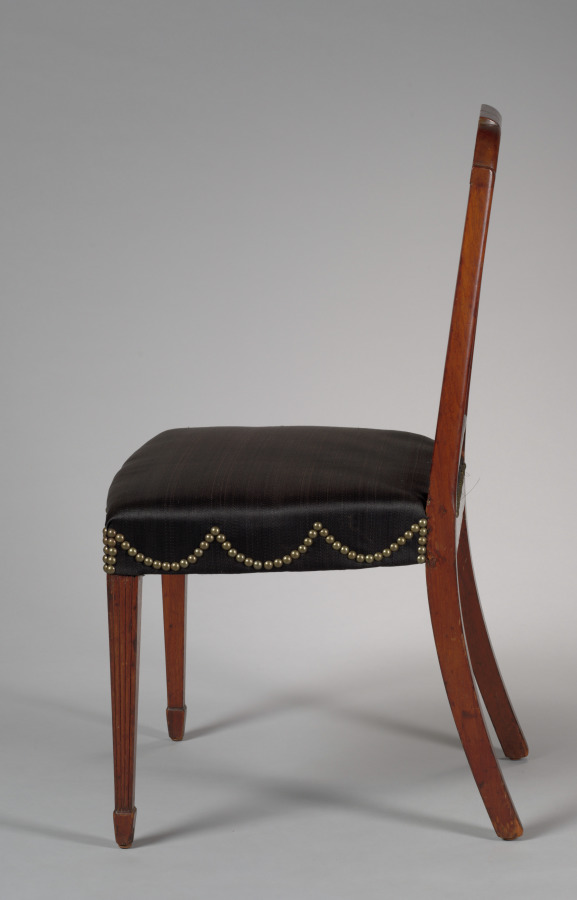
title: Side Chair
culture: America, Massachusetts, Boston, late 18th Century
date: c. 1790–1800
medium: mahogany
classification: Furniture and woodwork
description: Chairs of this or similar design seem to have been made by several Boston cabinetmakers. This chair may have belonged to one or more members of the distinguished Derby family or West family-or both-of nearby Salem, Massachusetts.